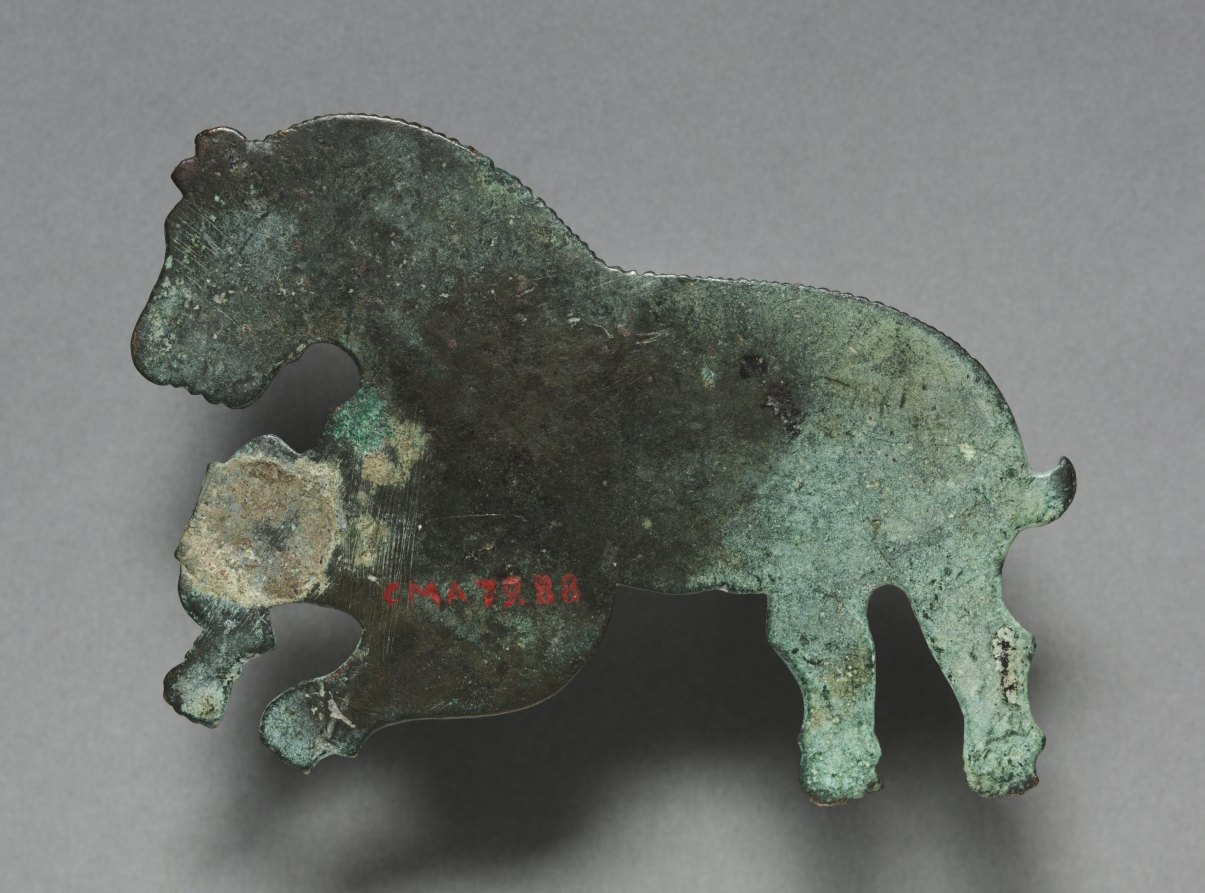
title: Wolf Attacking a Man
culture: Thrace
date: 400–300 BCE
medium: bronze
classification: Sculpture